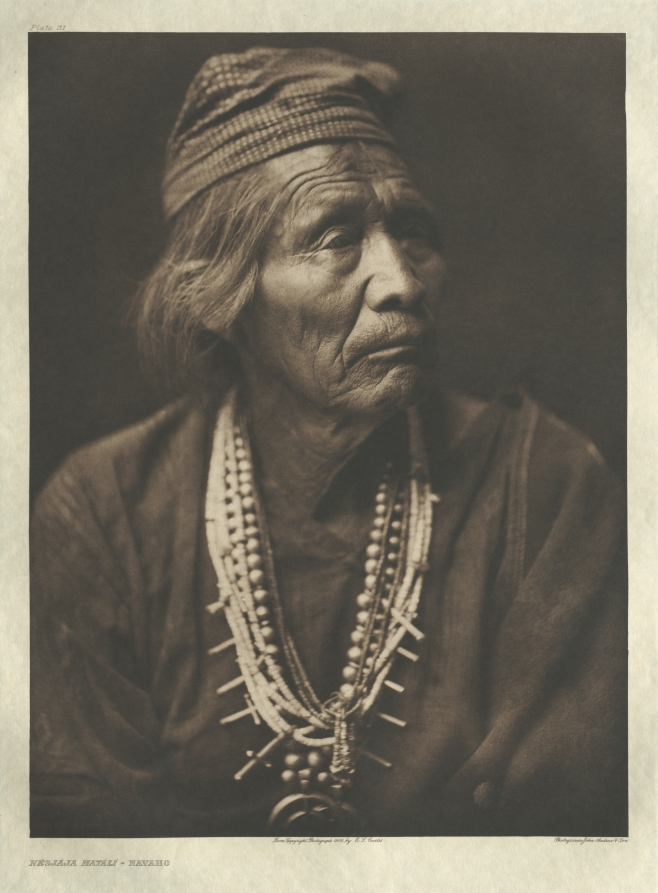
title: Portfolio I, Plate 31: Nesjája Hatáli-Navaho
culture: America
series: The North American Indian: being a series of Portfolios picturing and describing the Indians of the United States, the Dominion of Canada, and Alaska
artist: Edward S. Curtis (American, 1868–1952)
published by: The University Press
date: 1904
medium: photogravure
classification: Portfolio